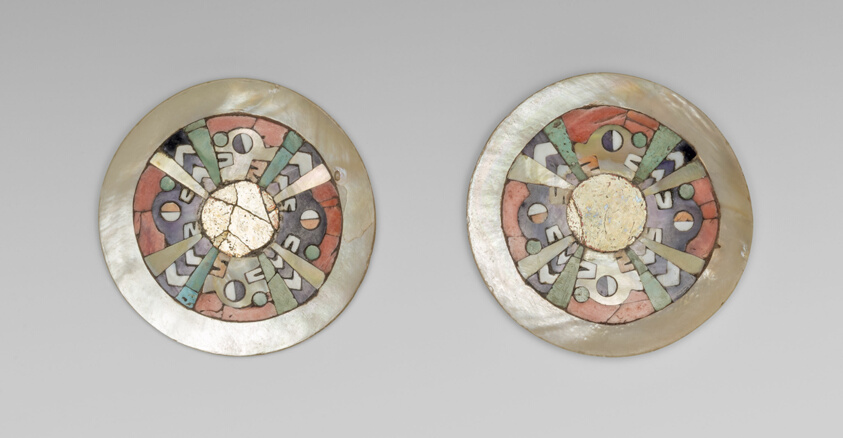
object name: Costume and Accessories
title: Ear Ornaments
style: tiahuanaco, huari, americas, andes, Arts of the Americas, andean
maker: Tiwanaku-Wari; Coastal Peru or highland Bolivia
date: 400–800 CE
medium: Shell, stone, silver, and copper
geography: Peru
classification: shell; jewelry; costume; art of the americas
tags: abstract figures, geometric